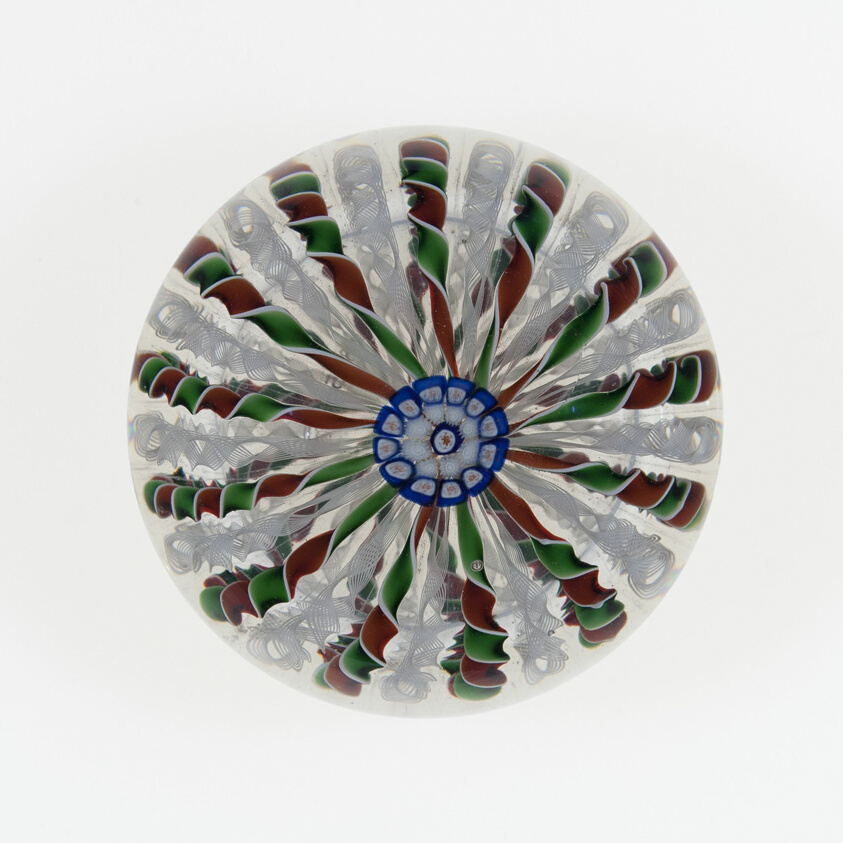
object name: Glass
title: Paperweight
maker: Saint-Louis Glassworks (Cristalleries de Saint-Louis); Lorraine, France, founded 1586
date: c. 1845–60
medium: Glass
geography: Saint-Louis-lès-Bitche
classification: paperweight; glass